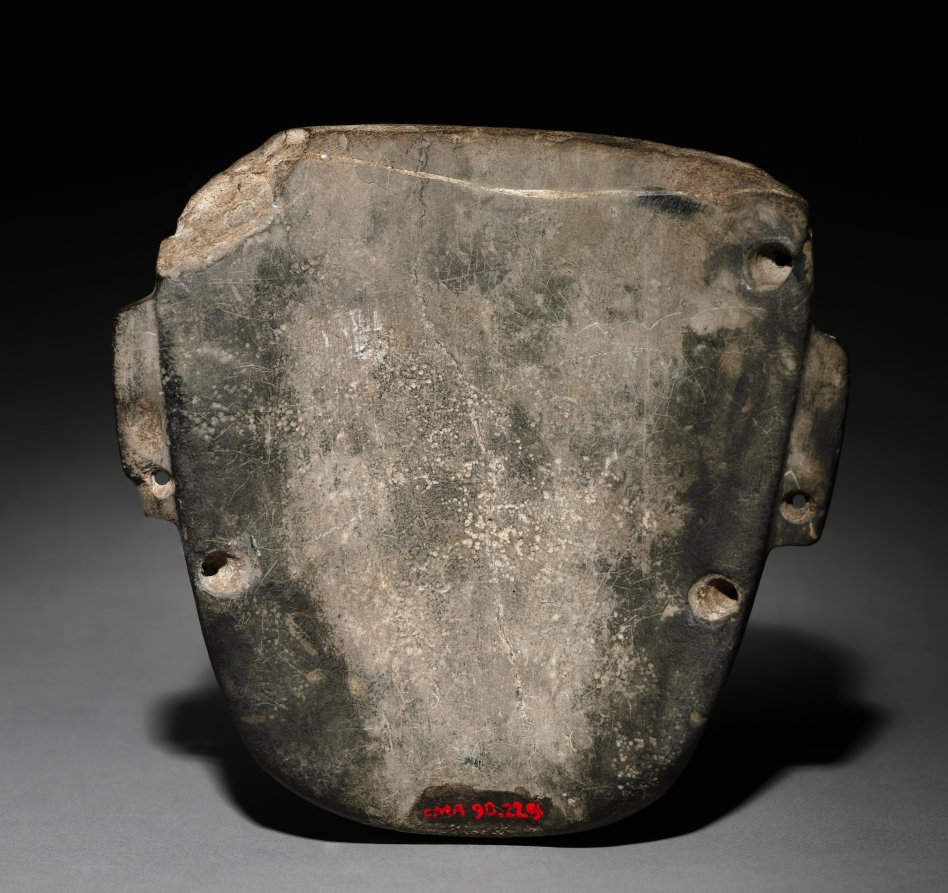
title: Mask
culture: Central Mexico, Teotihuacán style, Classic period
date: 1–550 CE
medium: stone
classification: Sculpture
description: Many Teotihuacán masks were once tied to something via holes on the back--perhaps a body-shaped form dressed in garments, ornaments, and a headdress that identified the figure. The stone masks’ eyes and mouths once held inlays representing irises, pupils, and teeth.